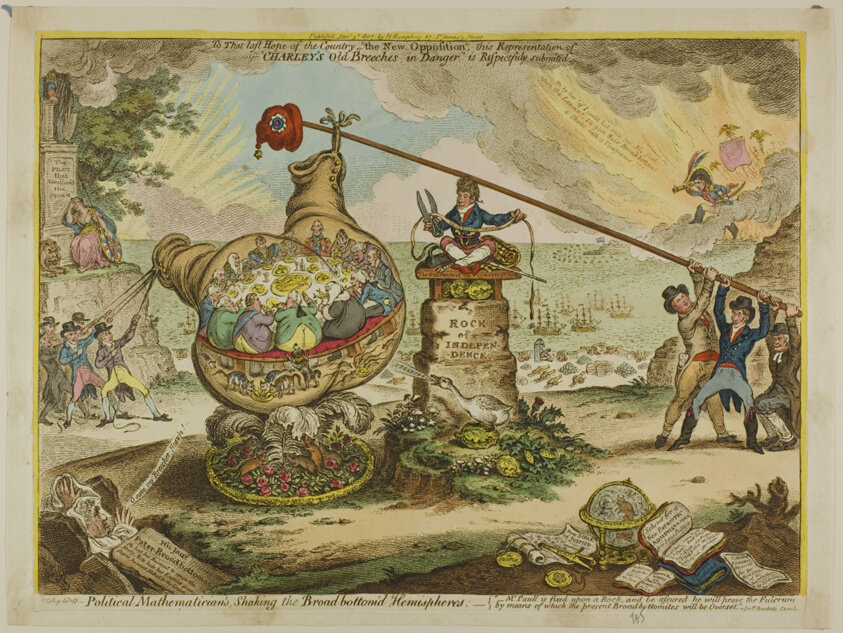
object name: Print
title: Political Mathematician's, Shaking the Broad Bottom'd Hemispheres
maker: James Gillray (English, 1756-1815); published by Hannah Humphrey (English, c. 1745-1818)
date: published January 9, 1807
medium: Hand-colored etching on paper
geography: England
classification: etching; print; prints and drawing